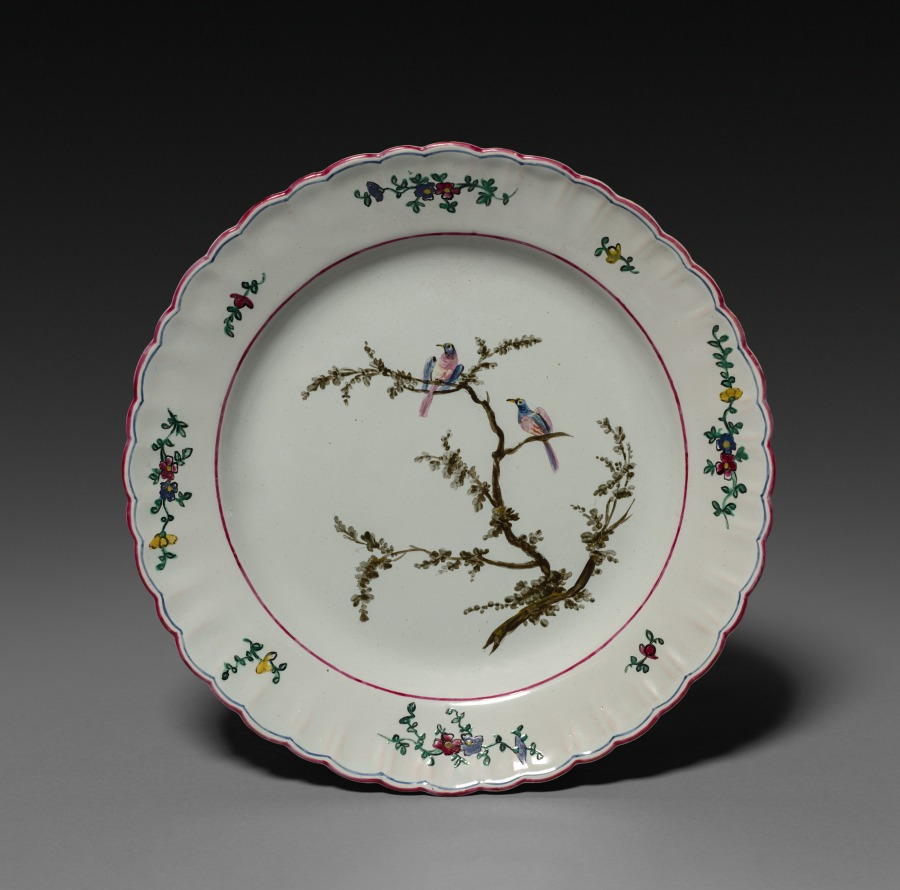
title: Plate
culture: France, Marseilles, 18th century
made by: Joesph- Gaspard Robert Factory (French)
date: 1750–1775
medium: faience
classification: Ceramic